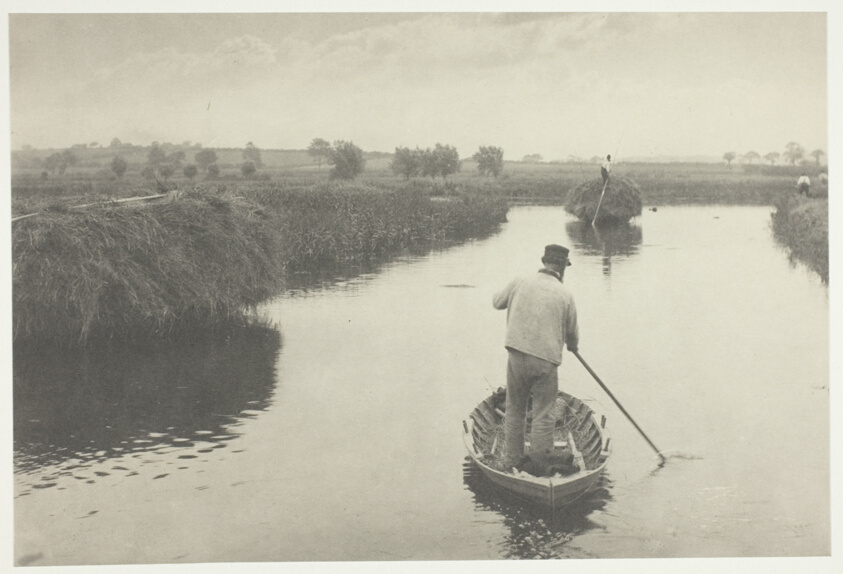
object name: Photograph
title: Quanting the Marsh Hay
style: 19th century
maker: Peter Henry Emerson (English, born Cuba, 1856–1936)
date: 1886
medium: Platinum print, pl. XVI from the album "Life and Landscape on the Norfolk Broads" (1886)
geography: England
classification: platinum print; photographic process; photography; photograph